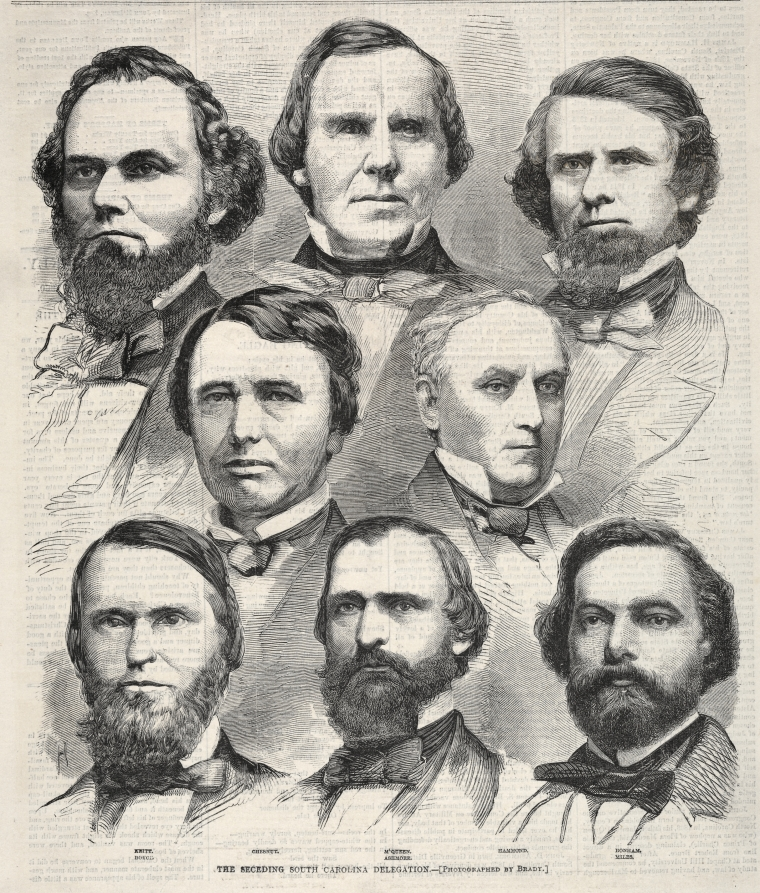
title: The Seceding South Carolina Delegation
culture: America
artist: Winslow Homer (American, 1836–1910)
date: 1860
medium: wood engraving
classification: Print